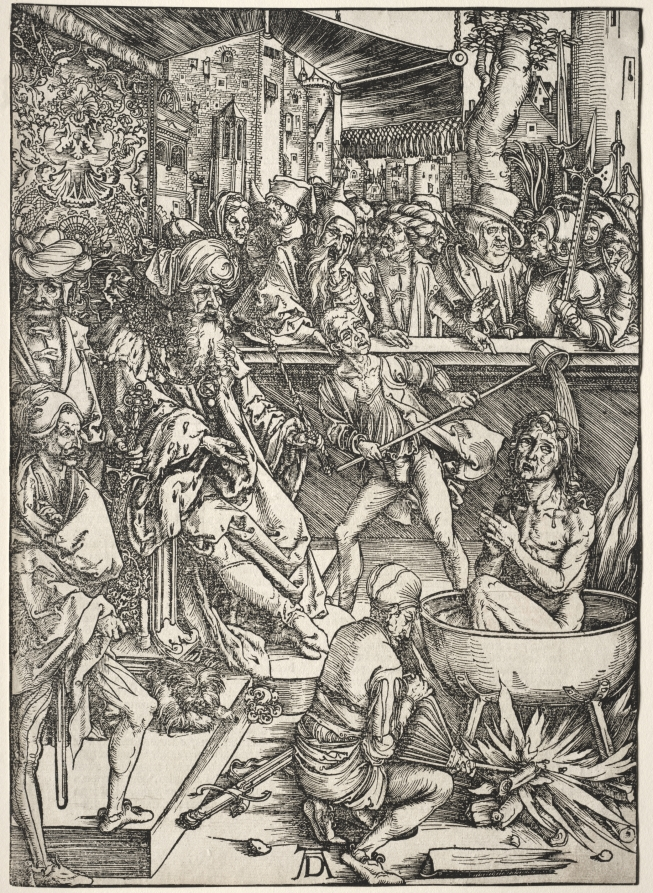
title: Revelation of St. John: Martyrdom of St. John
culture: Germany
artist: Albrecht Dürer (German, 1471–1528)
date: 1511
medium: woodcut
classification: Print